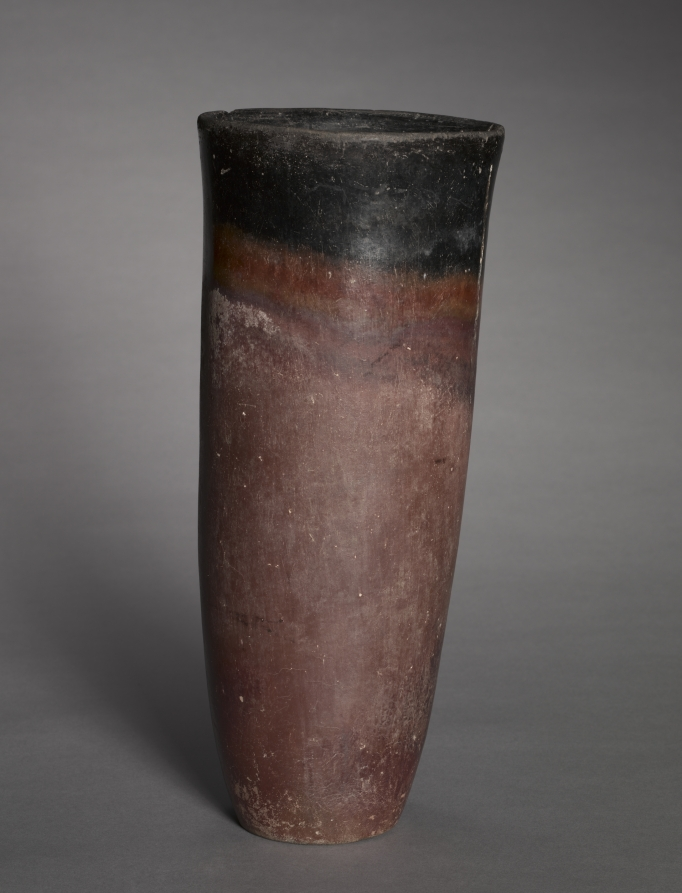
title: Black-Topped Beaker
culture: Egypt, Predynastic (5000–2950 BCE), Naqada I–IIb (3900–3300 BCE)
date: c. 4000–3500 BCE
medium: Nile silt pottery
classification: Vessels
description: Red polished vessels with black rims (known as black-topped red ware or B-ware) were the most common funerary pottery during the early Predynastic Period. The characteristic blackening of the rim was probably achieved by burying the mouth of the pot in the ashes of the kiln. The iron in the exposed part would then fire red while the covered area turned black.